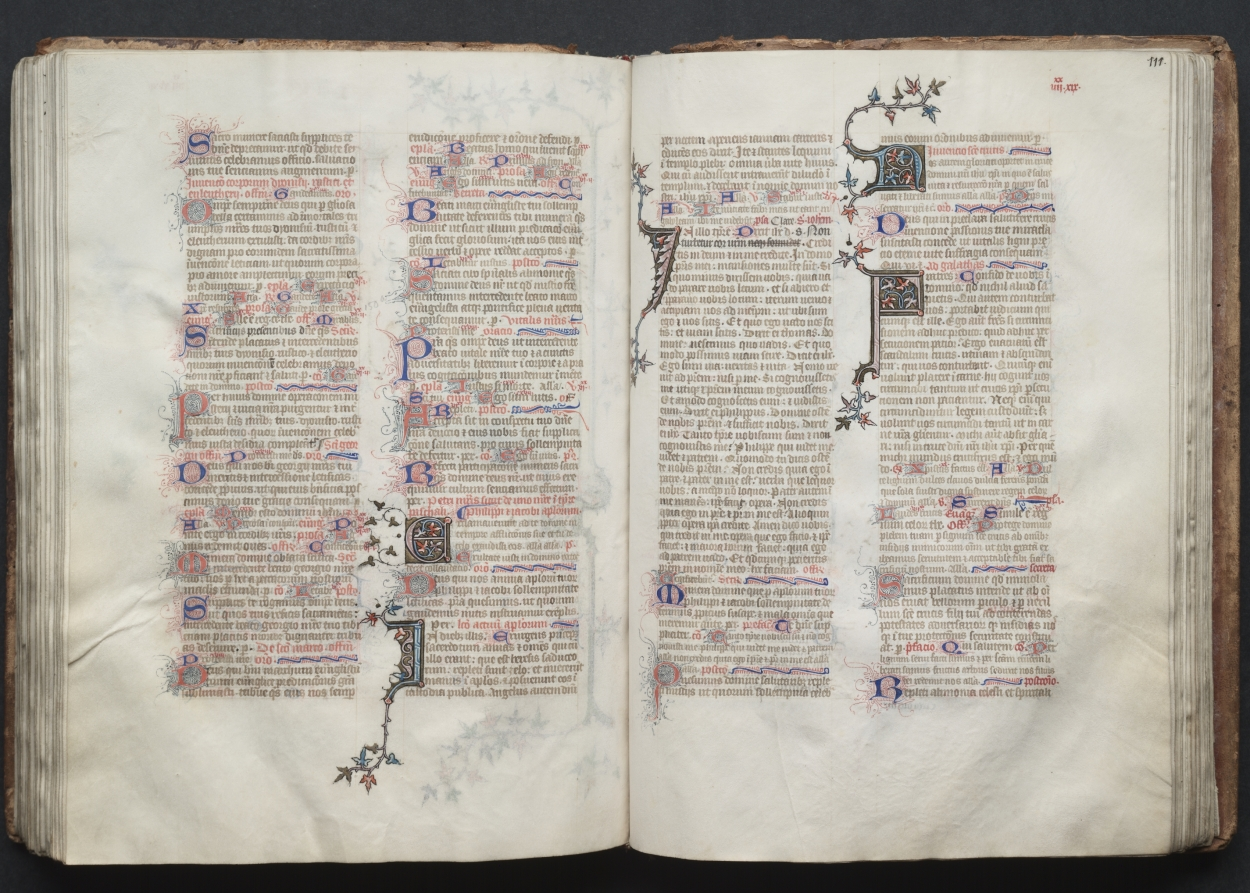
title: The Gotha Missal: Fol. 110v, Text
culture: France, Paris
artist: Master of the Boqueteaux (French)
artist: and Workshop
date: c. 1375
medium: ink, tempera, and gold on vellum; blind-tooled leather binding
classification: Bound Volume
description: The style and quality of this manuscript's decoration is typical of deluxe Parisian books made for aristocratic or royal patrons. Most of the book's decoration appears to be the work of the Master of the Boqueteaux, an artist active at the court of King Charles V (died 1380). His style was apparently shared by a number of book illuminators working in and around Paris. It is very possible that the Gotha Missal belonged to Charles V, but is not provable because the manuscript has no royal portraits and lacks a colophon. Given the book's magnificent decoration, however, it would seem that it was produced for a Valois prince, if not for the king himself. The manuscript receives its name from the German dukes of Gotha, its later owners.